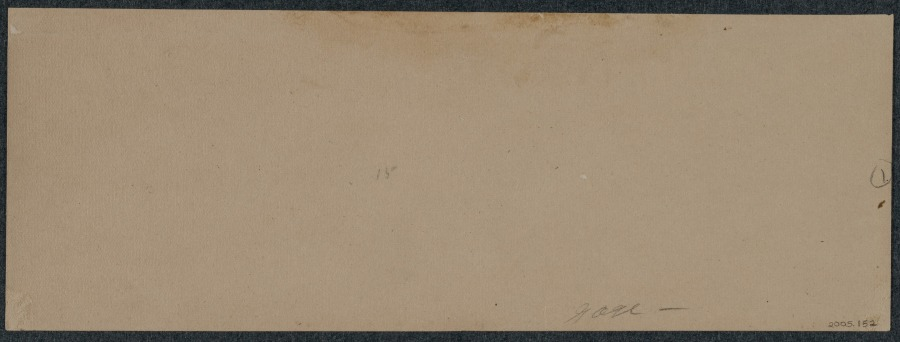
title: Entering Bergen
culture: England, 20th century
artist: Muirhead Bone (British, 1876–1953)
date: c. 1896–1953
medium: watercolor and graphite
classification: Drawing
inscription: Lower right and upper right, in graphite: M. Bone